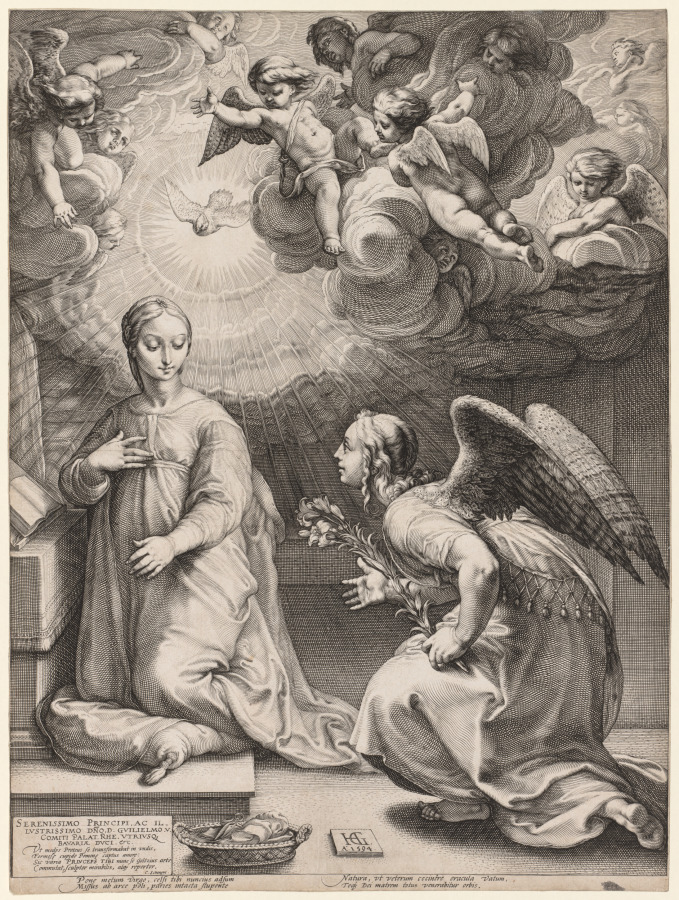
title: The Annunciation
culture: Netherlands, late 16th Century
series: The Life of the Virgin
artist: Hendrick Goltzius (Dutch, 1558–1617)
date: 1594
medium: engraving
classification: Print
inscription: lower center, in plate: HG [in monogram] / A°.1594· ; lower left, in plate: 'SERENISSIMO PRINCIPI. AC IL- / LVSTRISSIMO DN[horizontal line above 'N']O, D.[omino] GUILIELMO. V. / COMITI PALAT.[ino] RHE.[nano] VTRIUSQUE, / BAVARIÆ DVCI. etc. / Vt medys Proteus se transformabat in vndis, / Formosae cupido Pomonae captus amore: / Sic varia PRINCEPS TIBI nunc se Goltzius arte / Commutat, sculptor mirabilis, atque repertor. / C. Schonaeus. ; Across bottom, in plate: Pone metum virgo, celsi tibi nuncius adsum / Missus ab arce poli, paries intacta stupente / Natura, vt veterum cecinêre oracula vatum, / Teque Dei matrem totus venerabitur orbis. ; lower center, in plate: HG / A°. 1594. ; verso, upper left, in brown ink: A ; verso, lower left, in graphite: de[p?]/wpw[b?]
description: The series of six prints, The Life of the Virgin, is also known as the Master Engravings, an acknowledgment of Goltzius's significant achievement. Each of the six engravings evokes a different artistic style, imitating but not copying works by Albrecht Dürer (1471–1526), Federico Barocci (about 1535–1612), and others. An engraved dedication to Wilhelm V, Duke of Bavaria, appears in the lower left corner. Written by poet Cornelis Schoneus (1540–1611), it praises the versatility and skill of Hendrik Goltzius. The inscription across the bottom that refers to the subject of the print reads: "Set aside your fear, Virgin, I appear to you as a messenger sent from the heavenly vault: undamaged shall you give birth, to the astonishment of nature, following the prophecies sung by the ancient prophets, and the whole world will worship you as the mother of god."